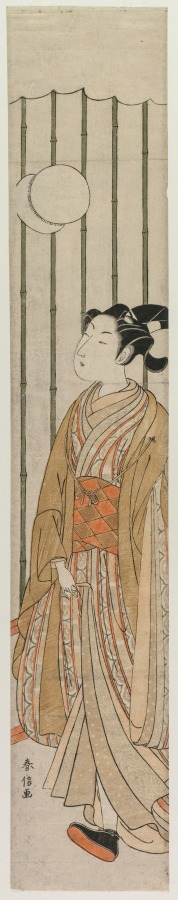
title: Young Man Playing Football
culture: Japan, Edo period (1615–1868)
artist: Suzuki Harunobu (Japanese, 1724–1770)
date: late 1760s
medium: color woodblock print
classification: Print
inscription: Signature: Harunobu ga